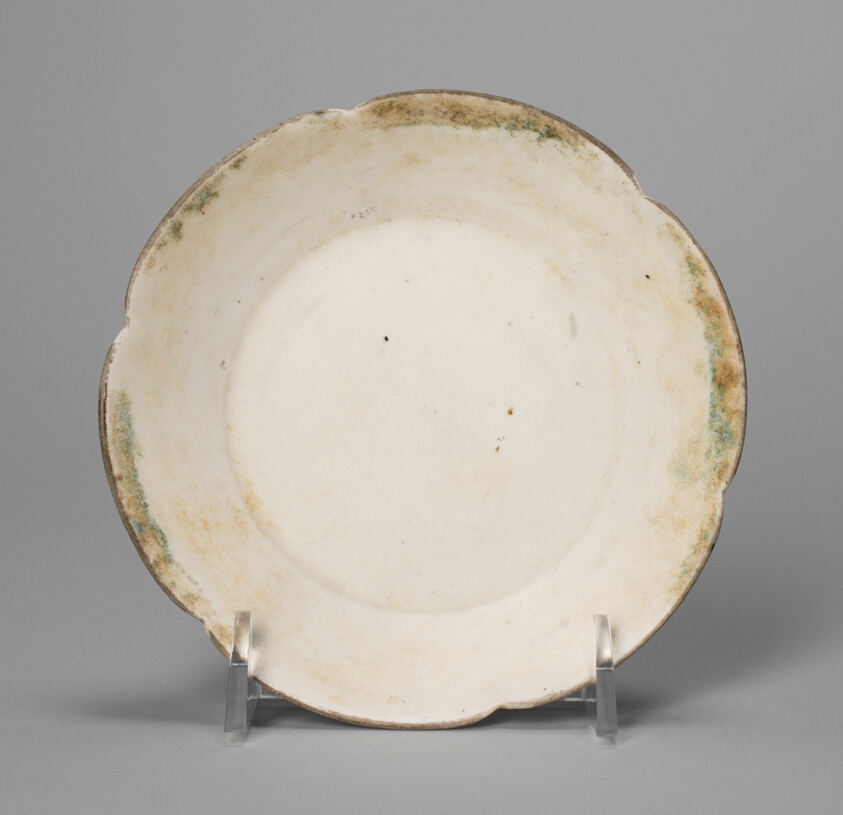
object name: Vessel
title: Lobed Dish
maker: China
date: Song dynasty (960–1279)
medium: Ding ware; stoneware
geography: China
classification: ceramics; asian art